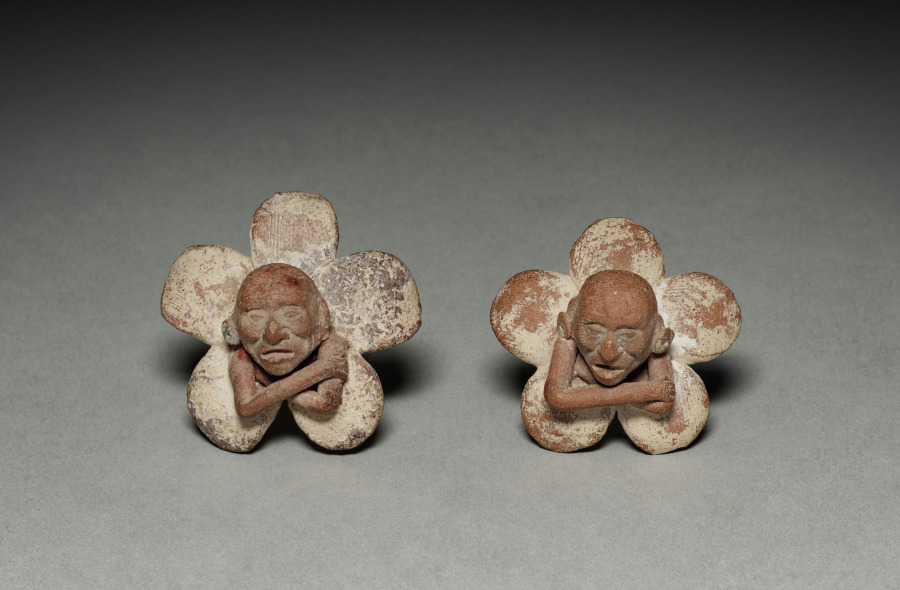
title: Pair of Figure in Flower Ornaments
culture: Mexico, Yucatán, Jaina Island region, Campeche, Maya style (250-900)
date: 500–900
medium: earthenware with slip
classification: Jewelry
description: Figures within flowers are one of the most enchanting themes of the Maya ceramic art of Jaina, an island off the western Yucatán coast. The figures, usually males who cross their arms over their bodies, are either radiantly youthful or aged (as here), suggesting a relationship to the life cycle.